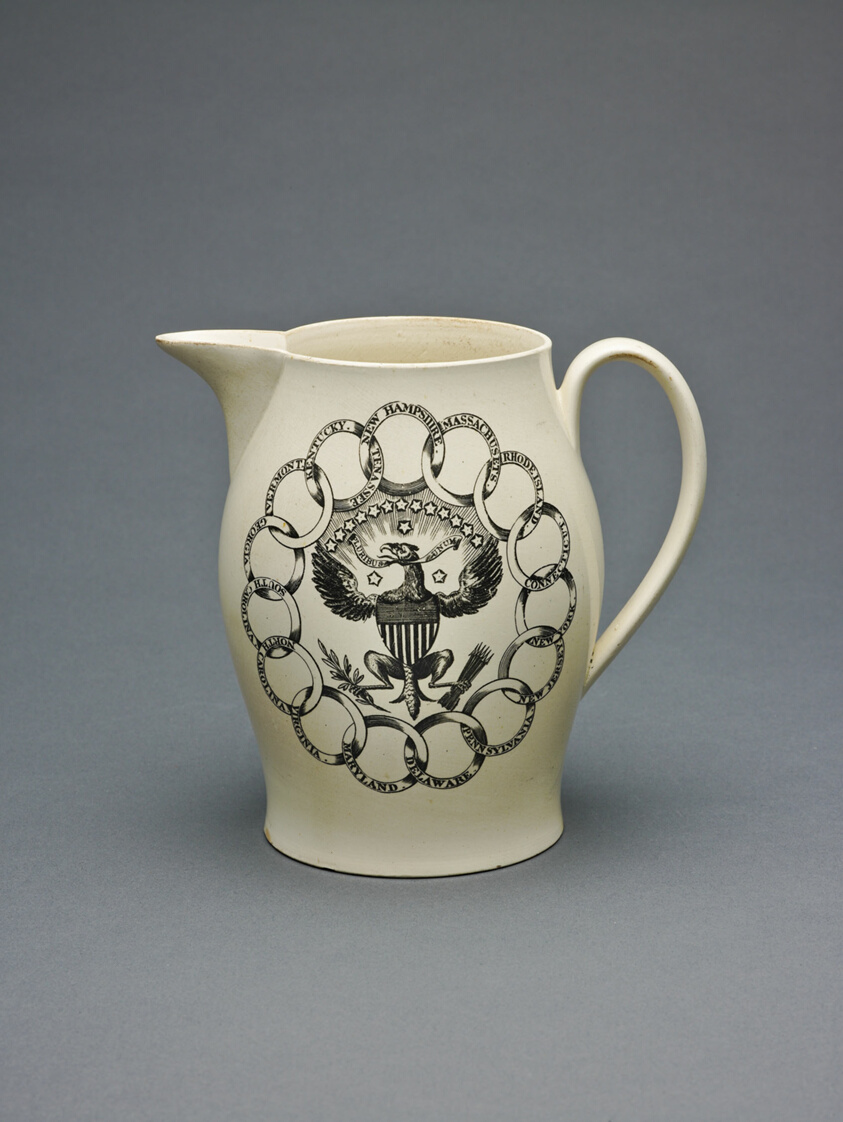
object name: Decorative Arts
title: Jug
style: Folk Art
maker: Liverpool, England; English for the American market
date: 1796–1803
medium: Earthenware (creamware) with transfer decoration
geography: Liverpool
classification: vessel; earthenware; american decorative arts; european decorative arts; ceramics; decorative arts